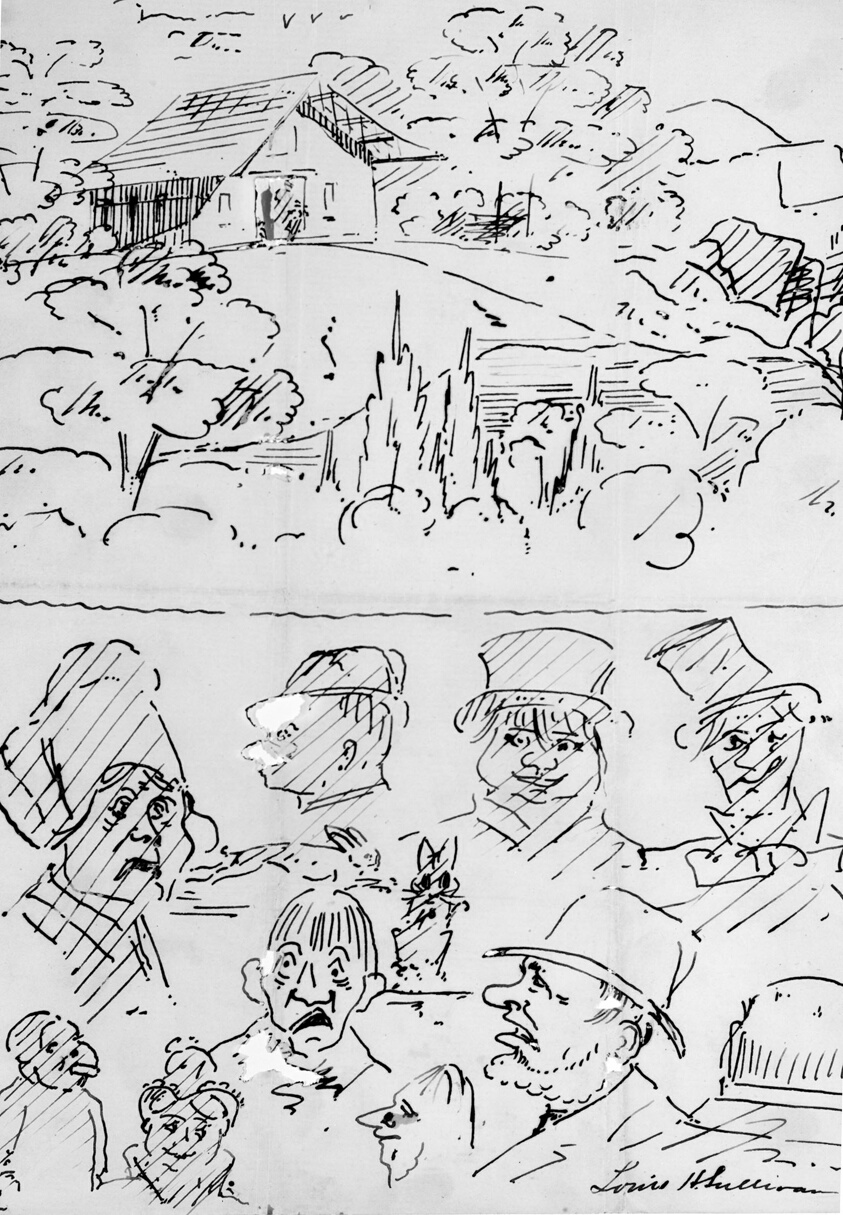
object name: Architectural Drawing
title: Landscape with Building (top) and Caricature Head Studies (bottom)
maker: Louis H. Sullivan (American, 1856-1924)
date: 1874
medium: Brown ink on paper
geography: United States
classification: architecture; architectural drawing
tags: landscapes, people